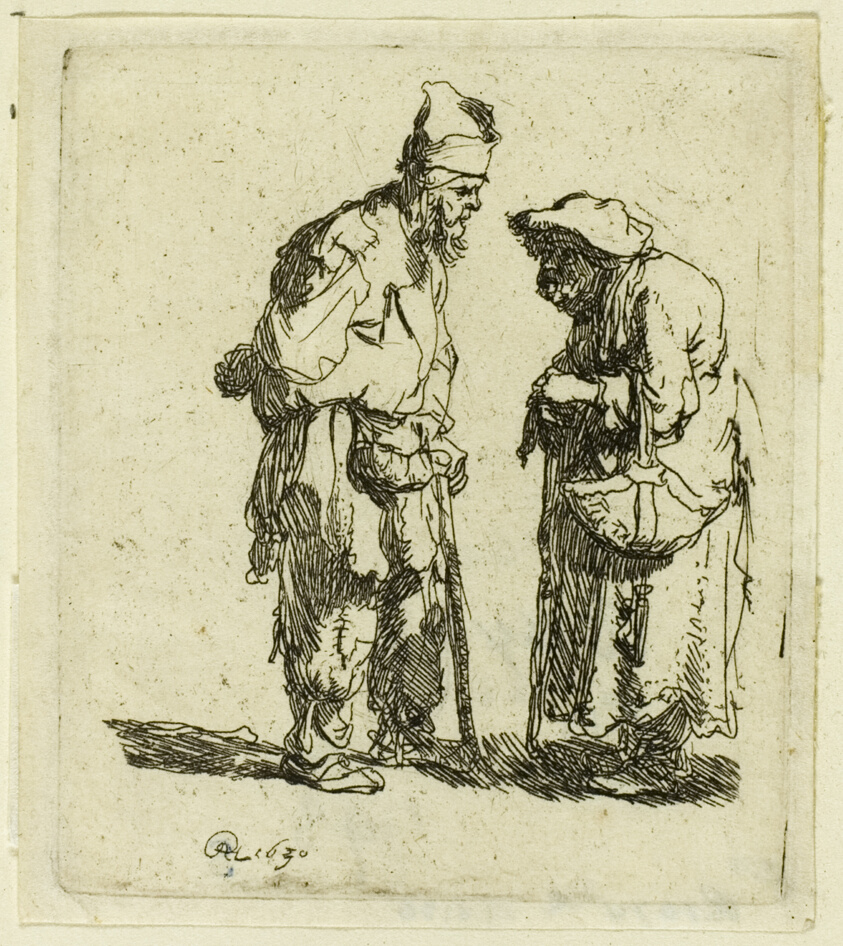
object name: Print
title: Beggar Man and Beggar Woman Conversing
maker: Rembrandt van Rijn (Dutch, 1606-1669)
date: 1630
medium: Etching on ivory laid paper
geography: Holland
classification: etching; print; prints and drawing; paper